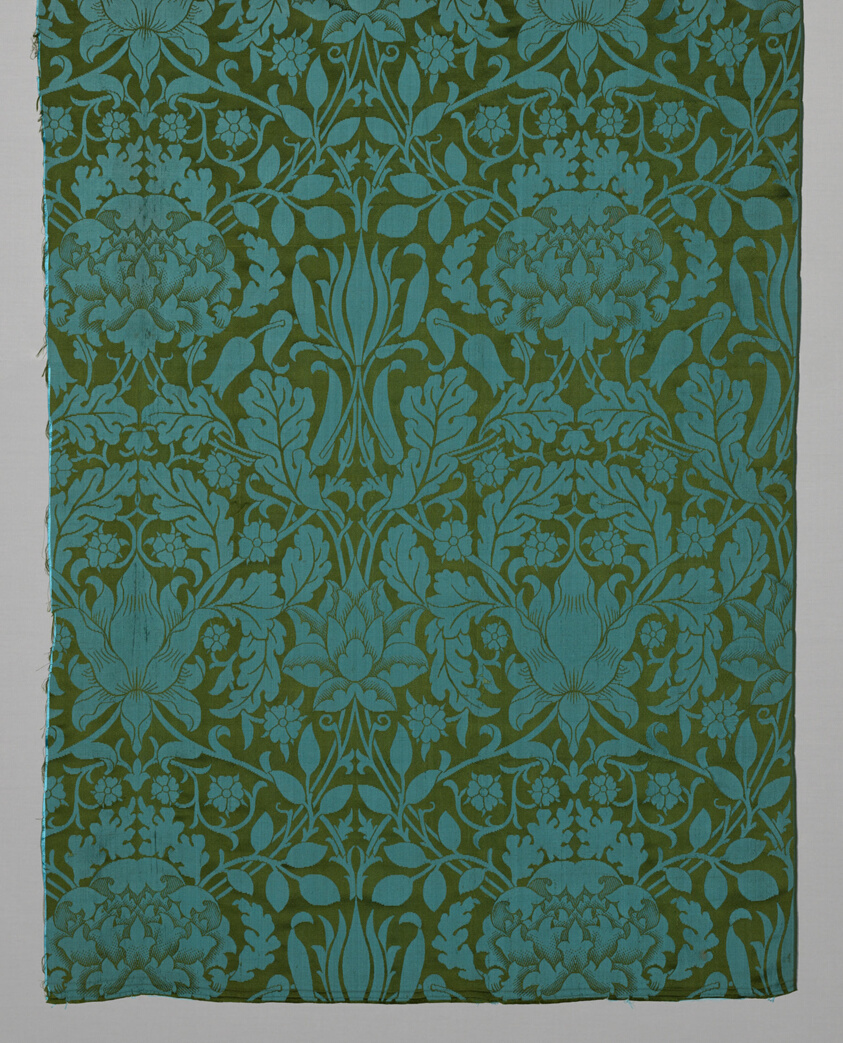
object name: Textile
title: Oak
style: Arts and Crafts Movement, british, 19th century, 20th Century, British Arts and Crafts Movement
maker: Designed by William Morris (English, 1834–1896); Produced by Morris & Co., London (English, 1875–1940); J.O. Nicholson, Macclesfield, Cheshire (English, founded 1865) or Merton Abbey, London (English, 1881-1940)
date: Designed 1881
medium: Silk; damask weave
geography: England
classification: textile; weaving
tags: foliage, botanical, floral